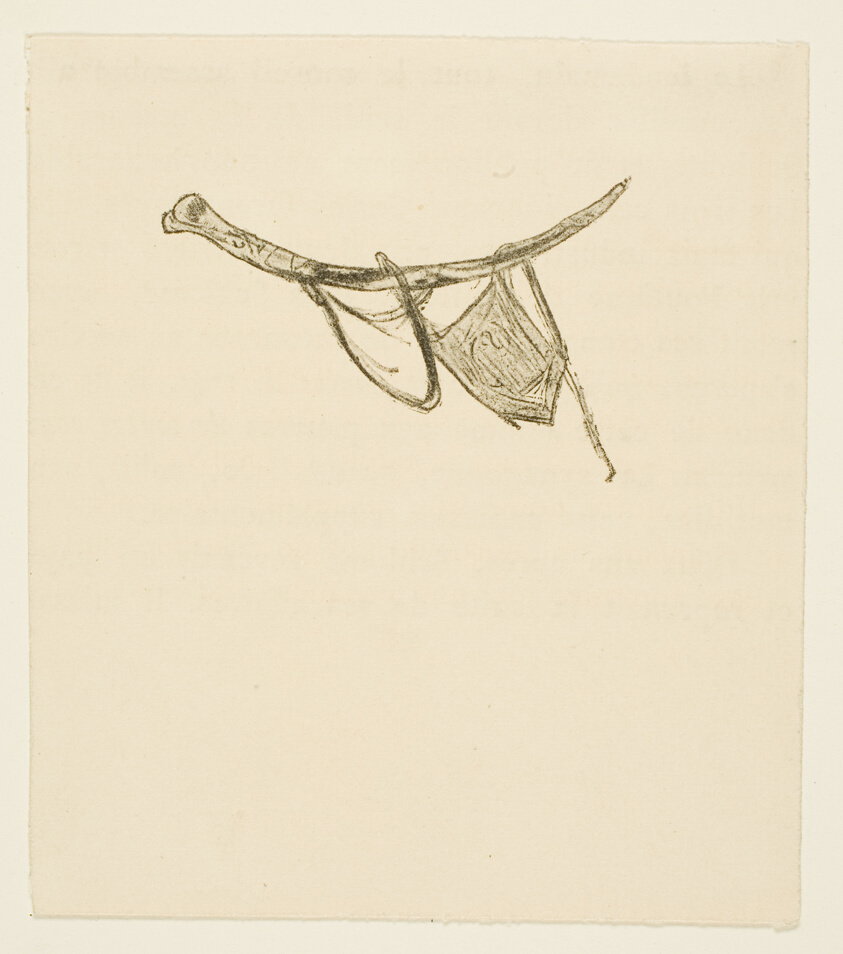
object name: Print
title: Tailpiece from Au Pied du Sinaï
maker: Henri de Toulouse-Lautrec (French, 1864-1901)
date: 1897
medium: Reproduction of a lithograph on cream wove paper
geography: France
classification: print (reproduction); prints and drawing; print